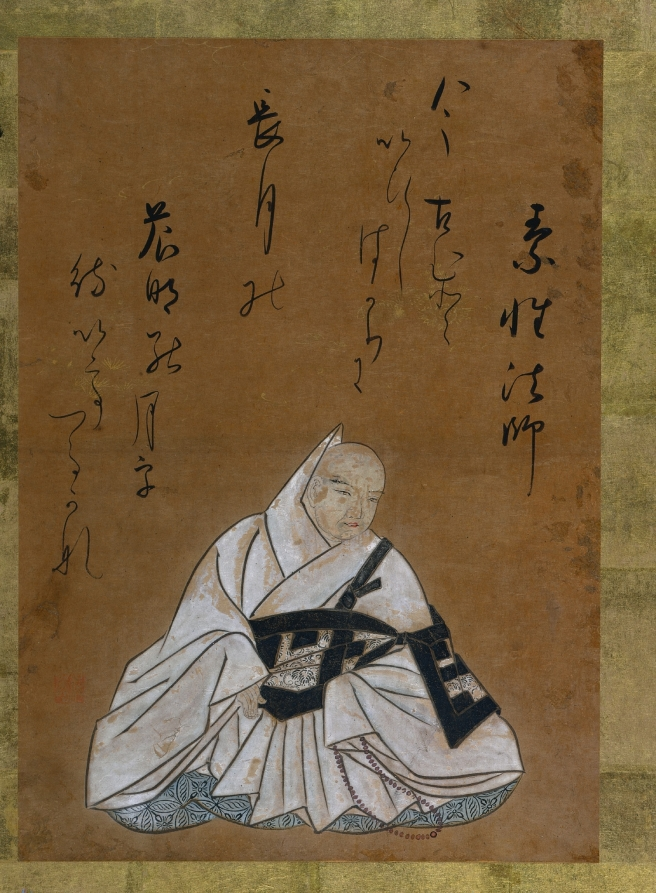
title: The Poet Sōsei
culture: Japan, Edo period (1615–1868)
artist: Shokadō Shōjō (Japanese, 1584–1639)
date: early to mid-1600s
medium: album leaf; ink and color on paper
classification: Painting